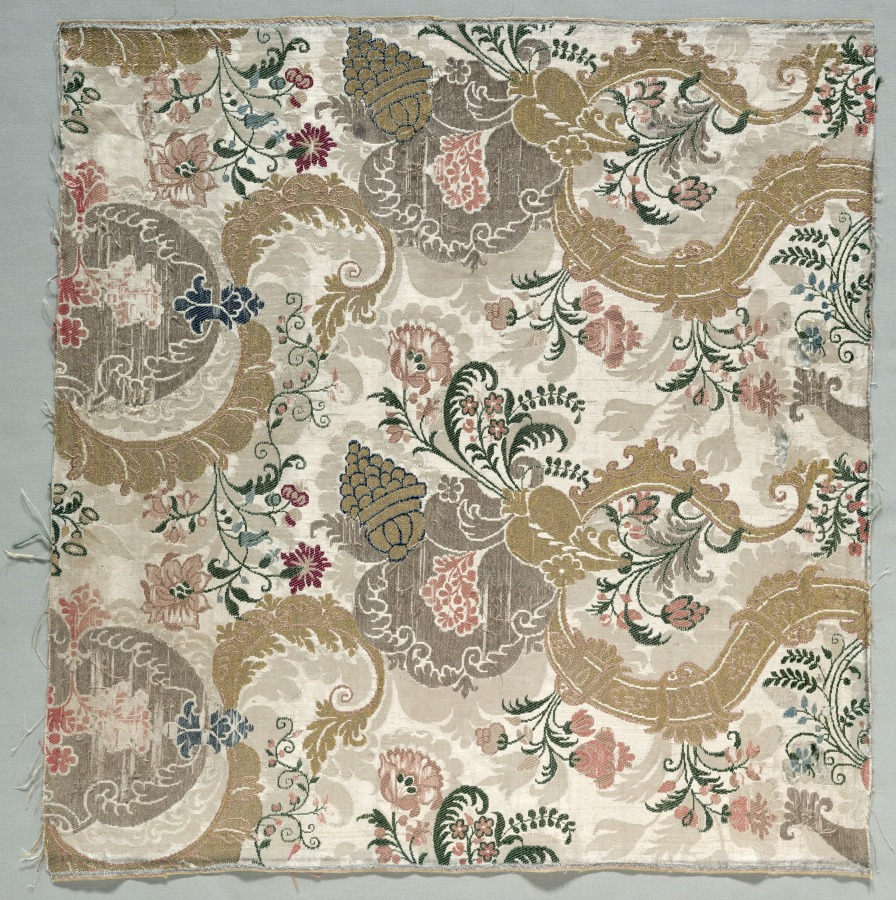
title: Lengths of Silk Textile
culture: Italy, 18th century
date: 1700s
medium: damask, brocaded; silk and metal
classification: Textile